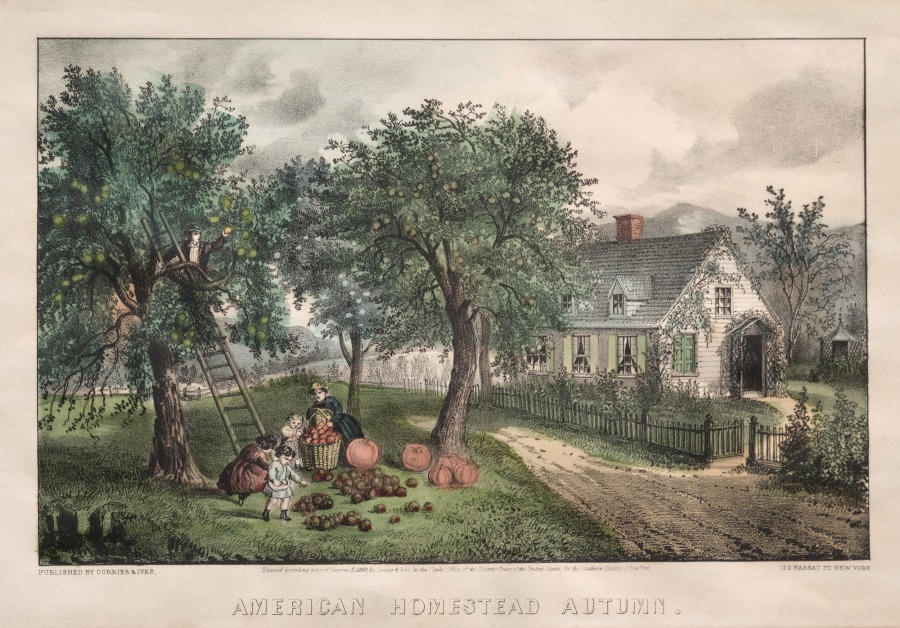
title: American Homestead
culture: America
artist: and James Merritt Ives (American, 1824–1895)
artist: Nathaniel Currier (American, 1813–1888)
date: 1869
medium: lithograph, hand colored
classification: Print